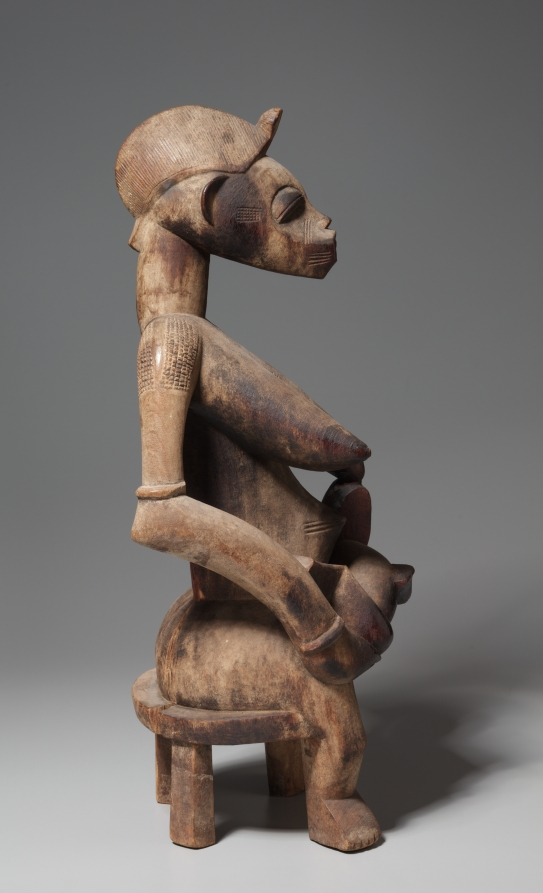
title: Nursing Woman with Child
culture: Africa, West Africa, Côte d'Ivoire, reportedly Korhogo area, Senufo-style carver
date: 1800s-1900s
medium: Wood and organic material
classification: Sculpture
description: Beyond its specific depiction of a mother nursing her child, this sculpture symbolizes a larger concept of ancestral motherhood that is central to Senufo society, in which cultural inheritance is matrilineal. The darkened areas of wood come from oils applied to its surface as both libations and surface protectants. In some Senufo beliefs, one of the most important founding ancestors is the Great Mother or Ancient Woman (Katyeleeo or Maleeo). In groups that believe in the Great Mother, she suckles male initiates with the "milk of knowledge." Through this process, youths gain the information they need to become adults (that is, fully human). The simplified appearance of the "child" in this sculpture reflects his unformed, pre-initiated state.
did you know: The mother’s face, adorned with incisions and markings, resembles that of women who have reached puberty.